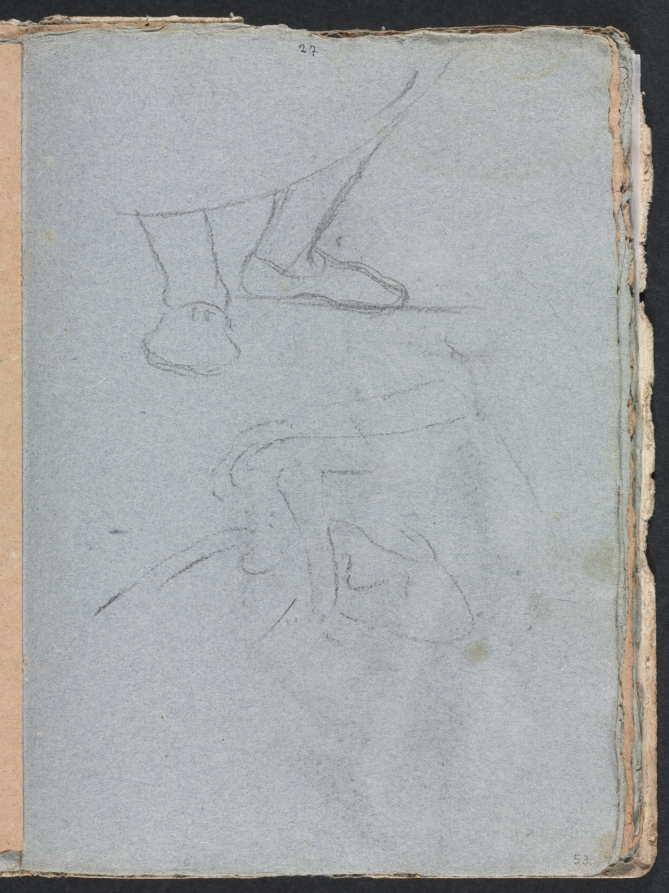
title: Verona Sketchbook: Study of feet (page 53)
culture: Italy, 18th century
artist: Francesco Lorenzi (Italian, 1723–1787)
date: 1760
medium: black chalk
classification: Bound Volume